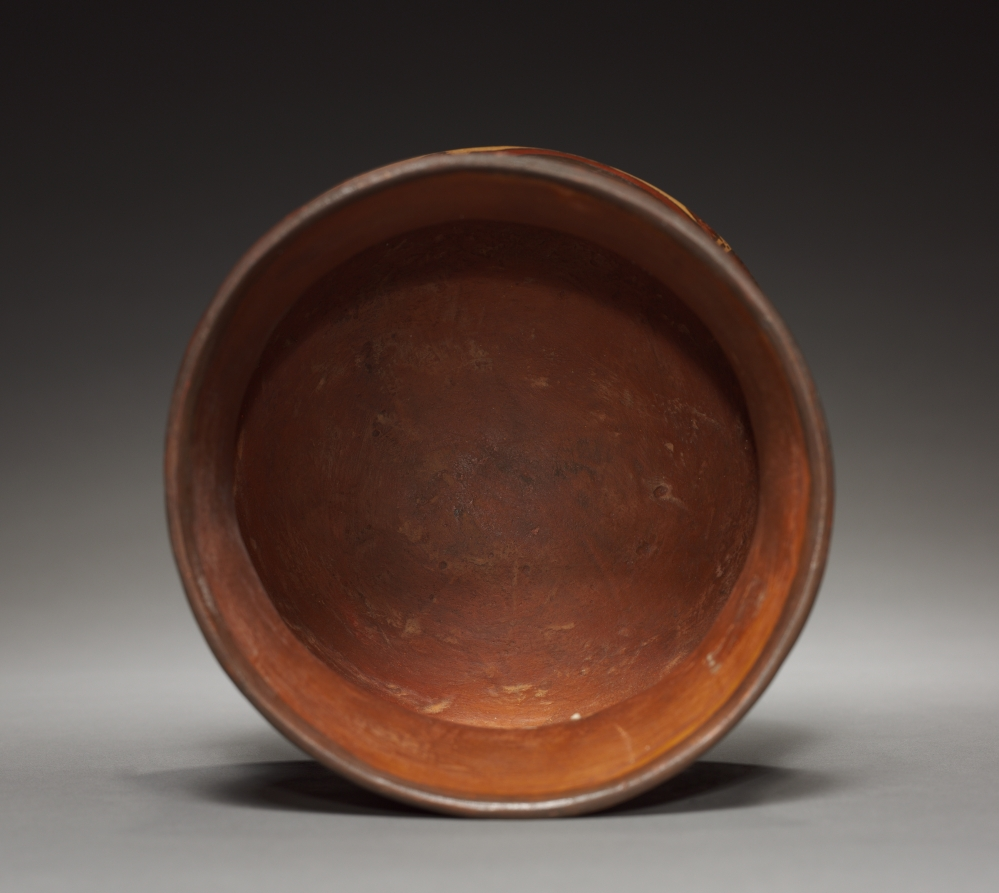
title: Vase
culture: Peru, South Coast, Nasca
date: 2000–20 BCE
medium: pottery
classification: Ceramic